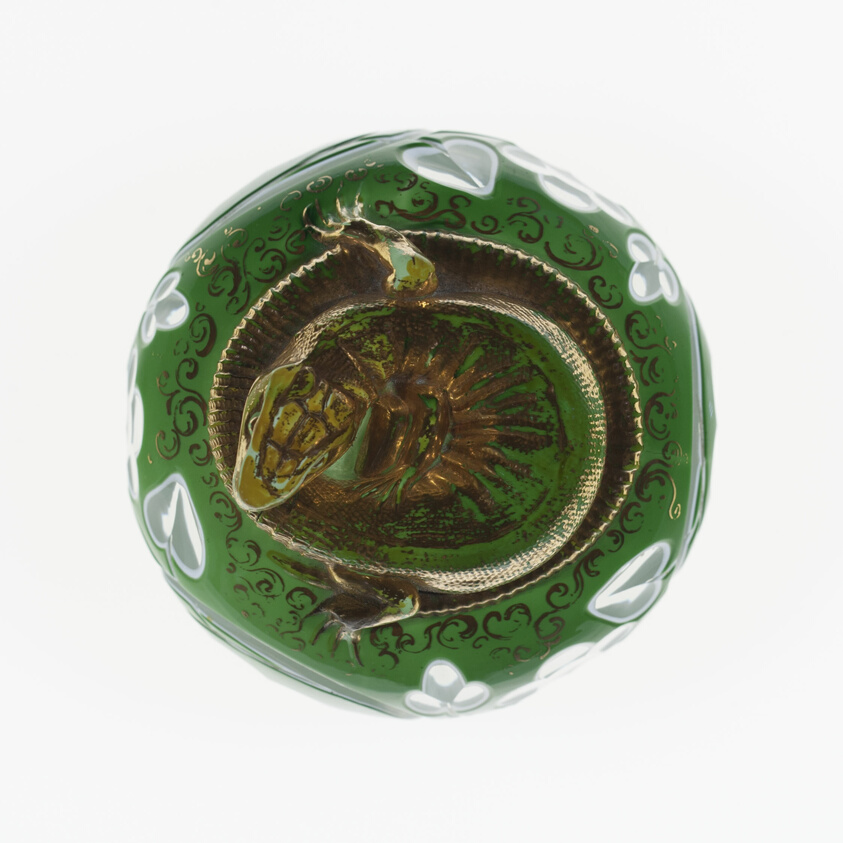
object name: Glass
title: Paperweight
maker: Saint-Louis Glassworks (Cristalleries de Saint-Louis); Lorraine, France, founded 1586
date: c. 1848–55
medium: Glass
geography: Saint-Louis-lès-Bitche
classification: paperweight; lampwork; european decorative arts; glass